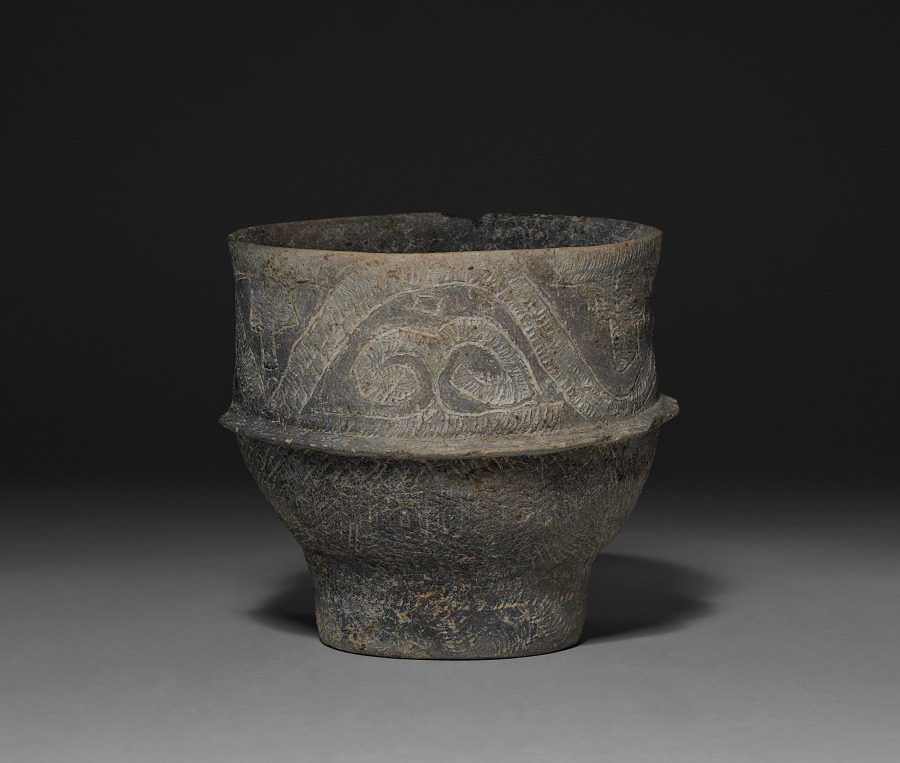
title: Jar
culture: Thailand, Ban Chiang, Neolithic Period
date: early 3000s BCE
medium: gray earthenware with incised decoration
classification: Ceramic